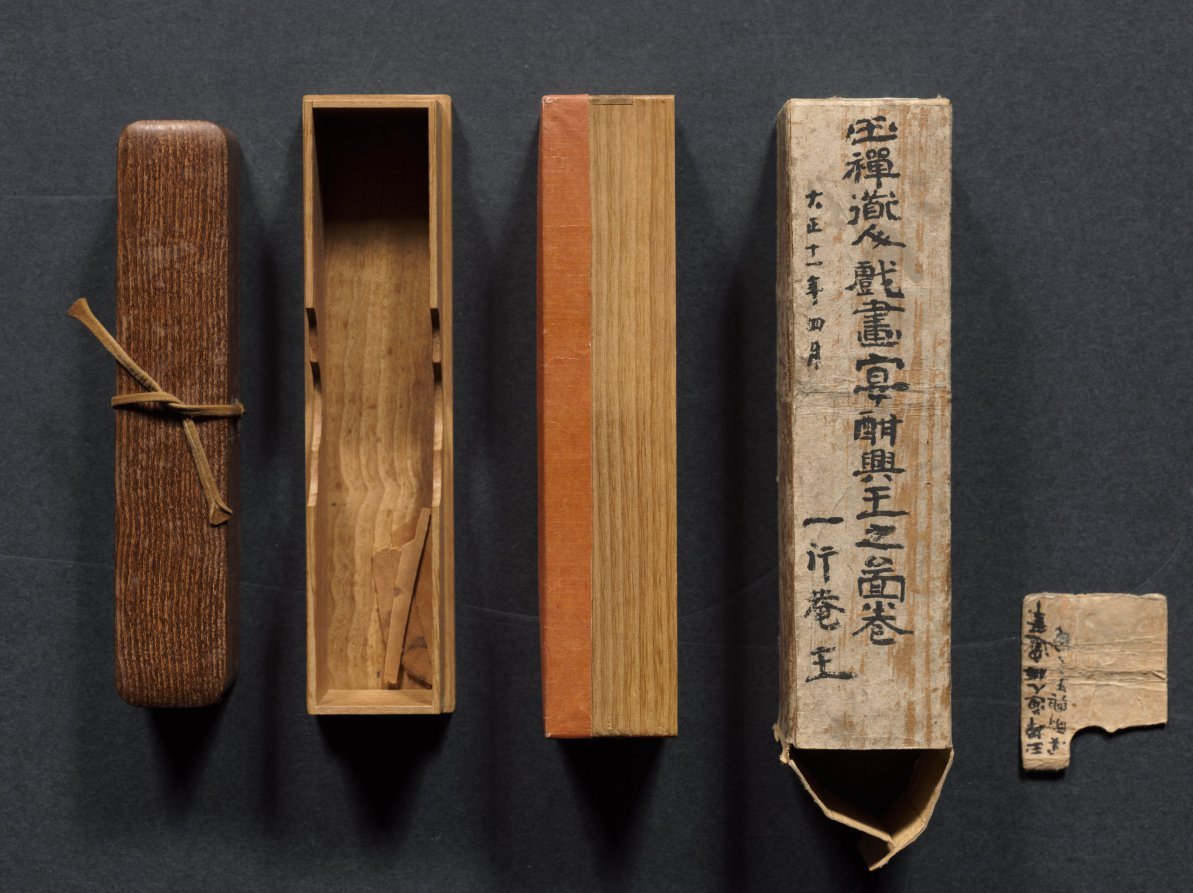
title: The Shadow Dancers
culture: Japan, Edo period (1615–1868)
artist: Yamamoto Baiitsu (Japanese, 1783–1856)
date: 1800s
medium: handscroll, ink and color on silk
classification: Painting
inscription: artist's signature and two seals at end of painting.